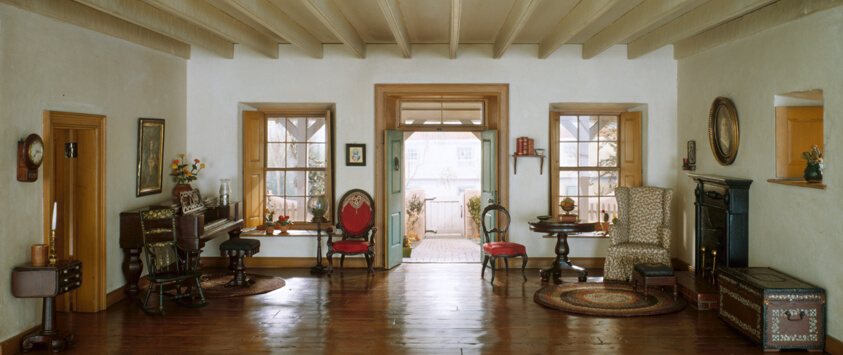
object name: Miniature room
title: A36: California Living Room, 1850-1875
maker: Designed by Narcissa Niblack Thorne; American, 1882-1966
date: c. 1940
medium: Miniature room, mixed media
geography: United States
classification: miniature; thorne rooms